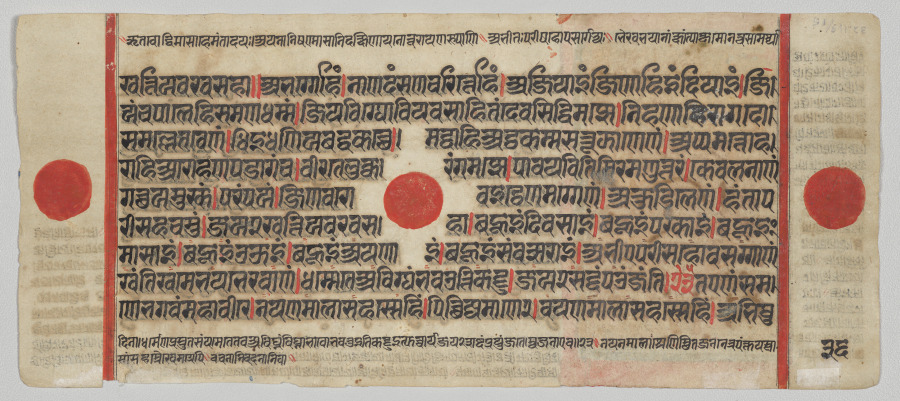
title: Text, Folio 36 (verso), from a Kalpa-sutra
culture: Western India, Gujarat, last quarter of the 15th century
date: c. 1475–1500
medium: Gum tempera, ink, and gold on paper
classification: Painting